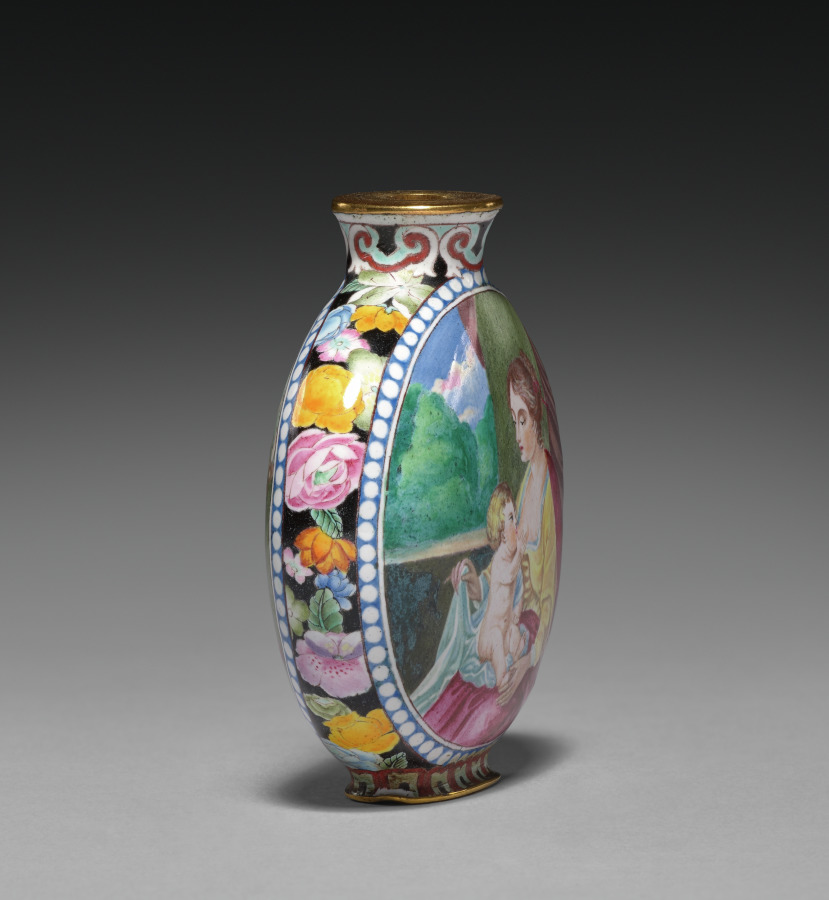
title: Snuff Bottle with European Figures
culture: China, Qing dynasty (1644-1911), Qianlong mark and reign (1736-95)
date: 1736–95 or later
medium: painted enamel on copper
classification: Enamel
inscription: 乾隆年製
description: Snuff bottles were introduced from Europe to China around the 1700s to hold portable snuff or medicine.